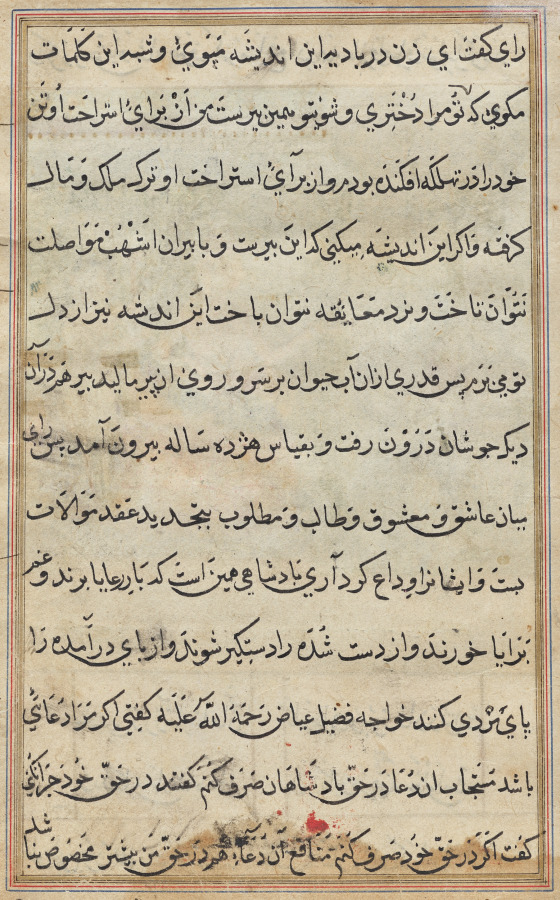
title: Page from Tales of a Parrot (Tuti-nama): text page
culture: Mughal India, court of Akbar (reigned 1556–1605)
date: c. 1560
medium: gum tempera, ink, and gold on paper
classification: Painting